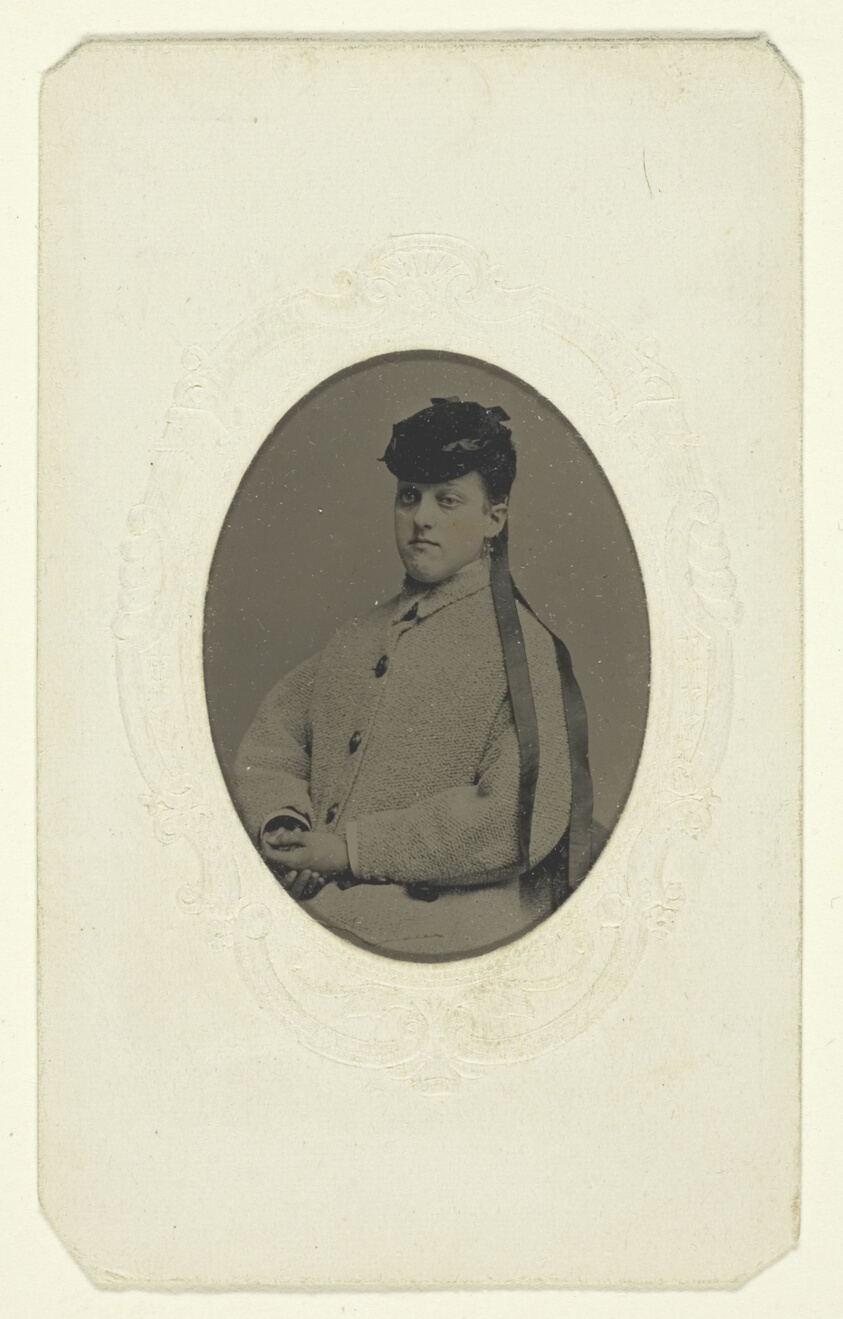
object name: Photograph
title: Untitled (Portrait of a Woman in a Hat)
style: 19th century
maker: Artist unknown; American, active late 19th century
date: 1840–1900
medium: Tintype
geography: United States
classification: tintype; photographic process; photography; photograph